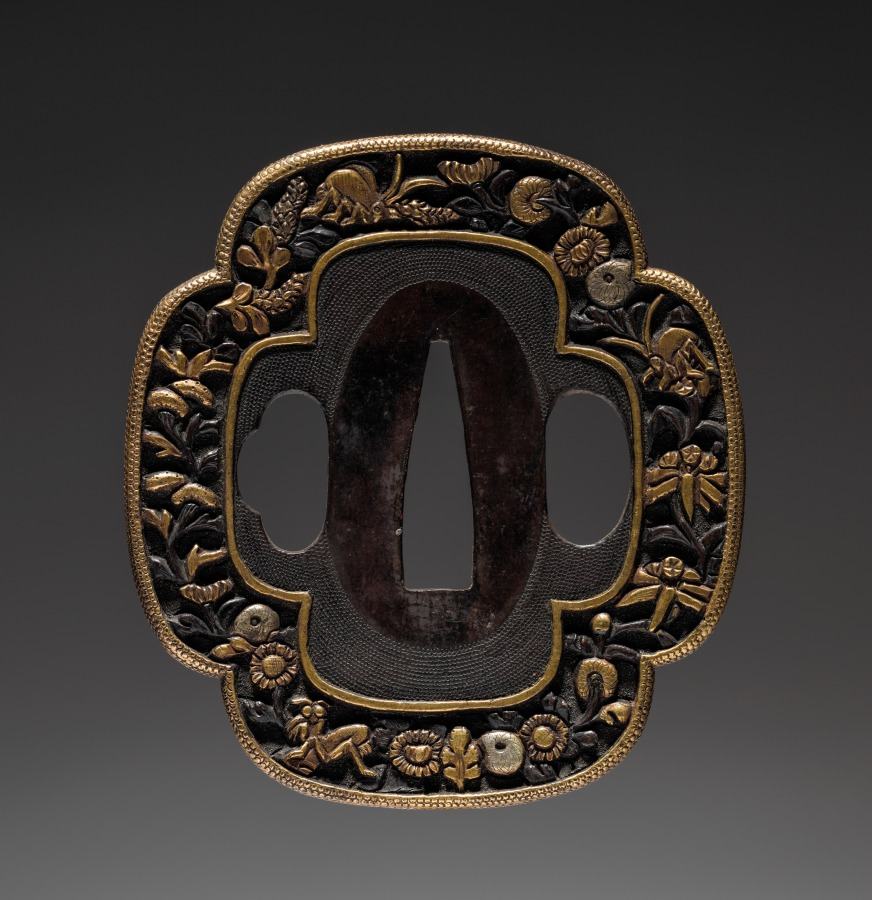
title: Sword Guard (Tsuba) with Insects and Flowers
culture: Japan, possibly Edo period (1615–1868)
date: c. 1615–1868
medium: metal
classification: Arms and Armor